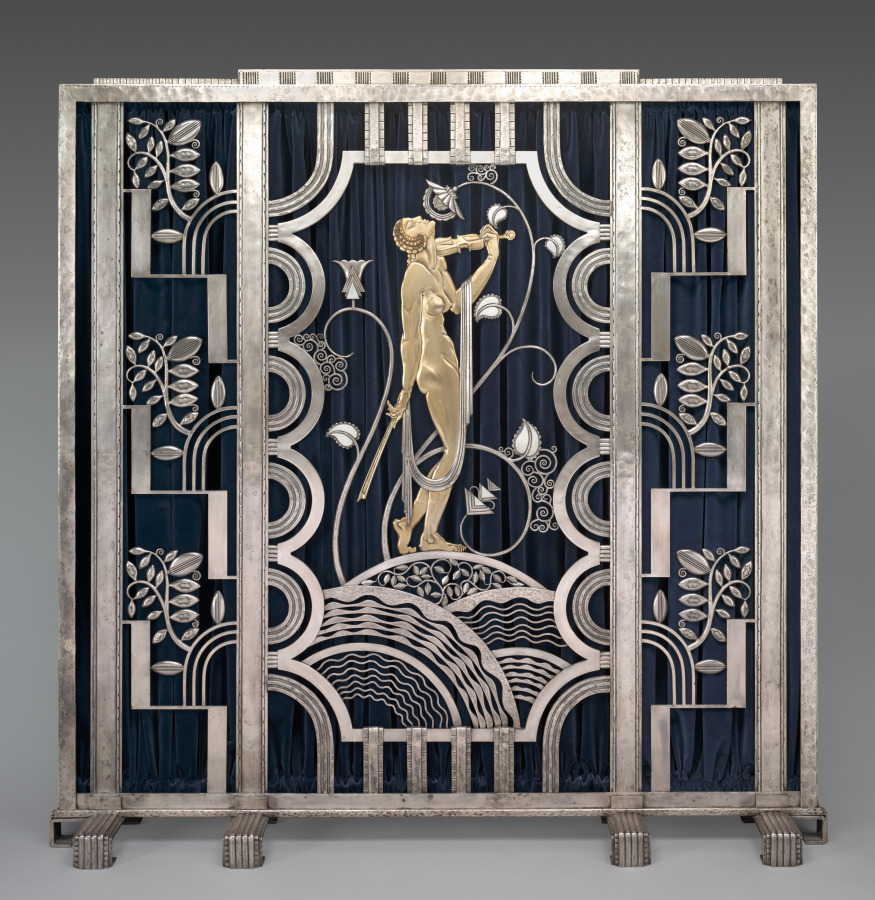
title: Muse with Violin Screen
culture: America, Ohio, Cleveland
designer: Paul Fehér (American, born Hungary, 1898–1990)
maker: Rose Iron Works (America, Ohio, Cleveland, est. 1904)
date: 1930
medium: Steel, brass; silver and gold plating, cotton velveteen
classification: Metalwork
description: Since the early years of the 20th century, the Rose Iron Works, a Cleveland supplier of architectural ornament, has produced distinguished metalwork. The company’s founder, Martin Rose, was born in Austria-Hungary and studied ornamental metalsmithing in Vienna prior to immigrating to Cleveland in 1902. In the 1920s, he hired a talented young Parisian designer, Paul Fehér, to work for the firm. Fehér’s designs, culminating in this massive screen, brought a modern European sensibility to the Rose Iron Works production. With its geometric patterning, highly stylized and abstracted natural forms, and the central figure reminiscent of the celebrated jazz singer Josephine Baker, this screen reflects the classic motifs of Art Deco design.